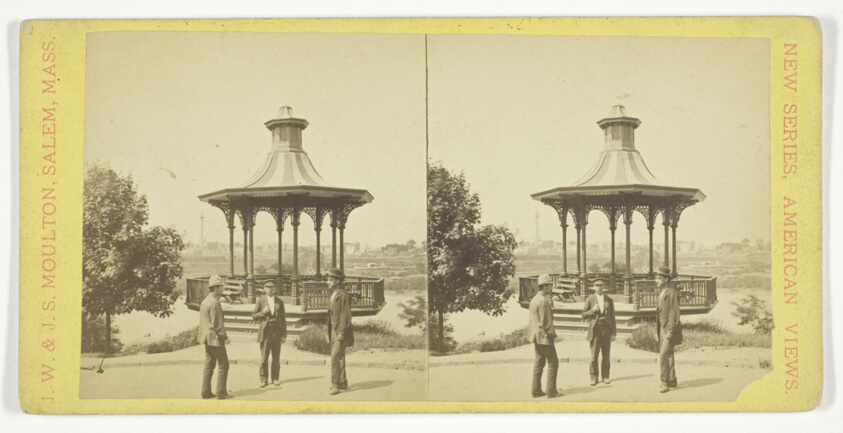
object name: Photograph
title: Fairmount Park Scenery, Philadelphia, Pa., from the series "Gems of American Scenery"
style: 19th century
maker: J.W. & J.S. Moulton (Americans, active 1873-1881)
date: 1873/81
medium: Albumen print, stereo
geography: Salem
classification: photography; photograph